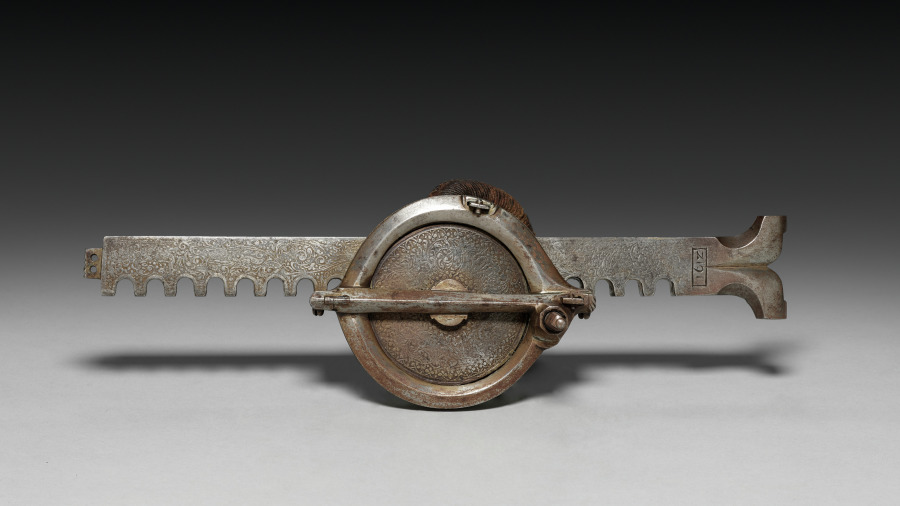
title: Cranequin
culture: Germany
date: 1600s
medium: steel, etched; flax cord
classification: Arms and Armor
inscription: inscribed 1612 (not original); maker's mark (indecipherable)